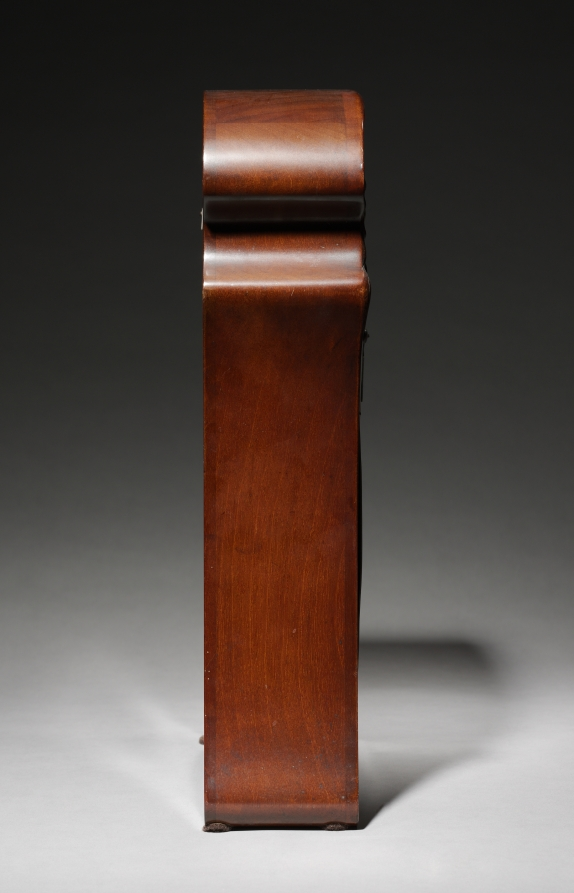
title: Mantle Clock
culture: America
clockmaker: Lenzkirch Clock Factory (German)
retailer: Tiffany & Co. (America, New York, est. 1837)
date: 1901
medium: brass, mahogany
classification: Wood